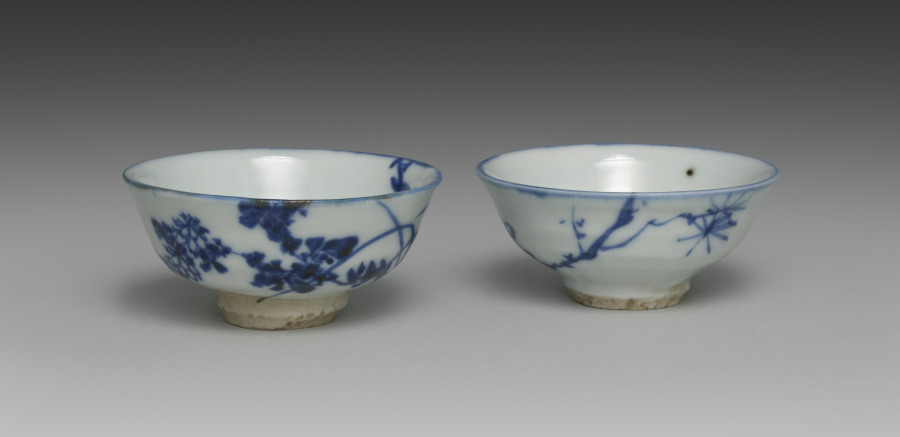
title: Sake Cups with Auspicious Flora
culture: Japan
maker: Seifū Yohei II (Japanese, 1844–1878)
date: 1861–78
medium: Pair of sake cups; porcelain with underglaze blue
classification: Ceramic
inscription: 松梅芝仙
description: Seifū Yohei II and his successor, Seifū Yohei III, trained in ink painting. Their brush skills are seen in their underglaze cobalt blue designs. One of Yohei II’s sake cups has depictions of orchid, bamboo, and chrysanthemum, representing spring, summer, and fall, while the other has pine and plum, representing winter. Just under the rim, he has also brushed the phrase “Pine, plum, and fungus immortals” (松梅芝仙).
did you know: These modest cups are important for the connoisseurship of the art of Yohei II because their original box is intact with a signature and seal on the interior of the lid.